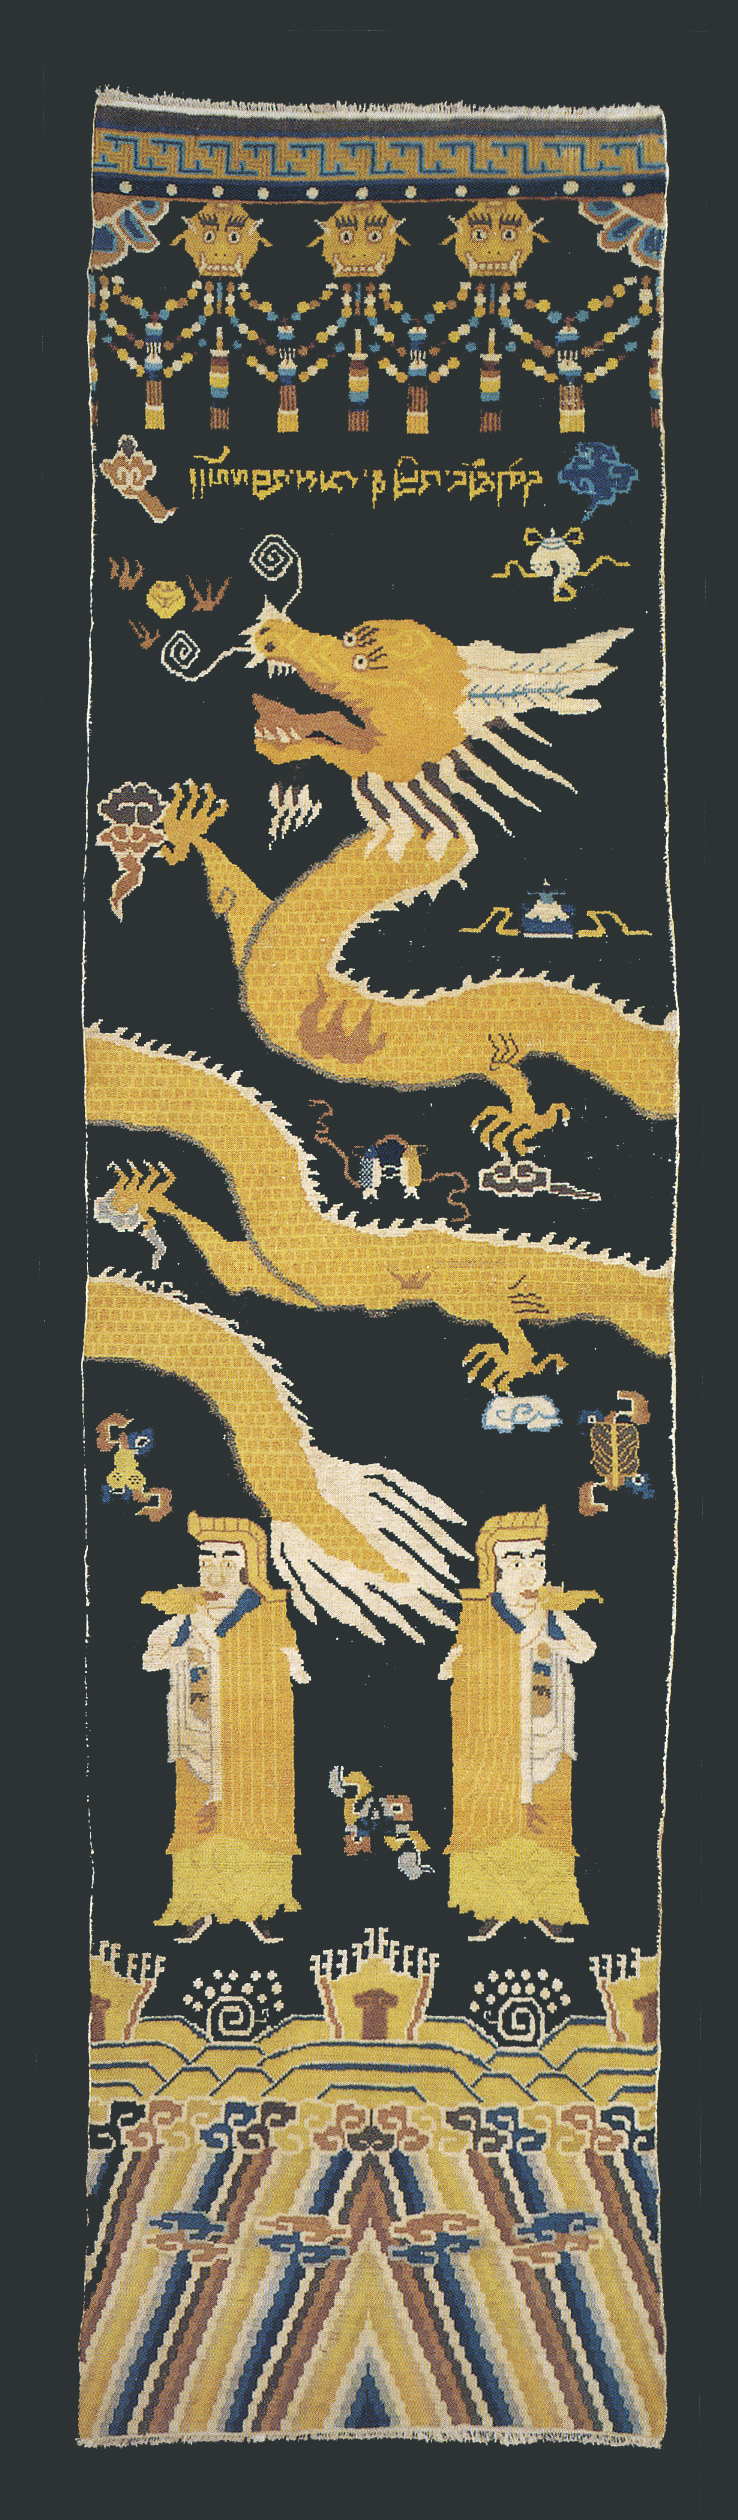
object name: Textile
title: Carpet (For a Buddhist Temple Column)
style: qing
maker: China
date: Qing dynasty (1644–1911), mid–19th century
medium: Cotton and wool, plain weave with supplementary wrapping wefts forming cut pile through a technique known as left-handed Sehna or Persian knot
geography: China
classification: textile; weaving - carpet; weaving